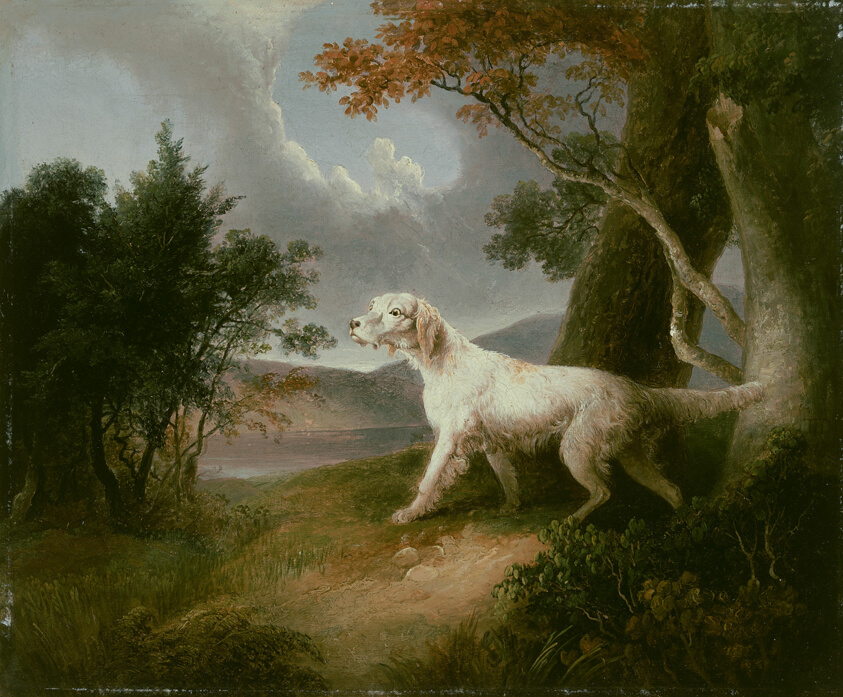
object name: Painting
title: Landscape with Dog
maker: Thomas Doughty (American, 1793–1856)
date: 1832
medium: Oil on composition board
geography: United States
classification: painting; american arts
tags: animals